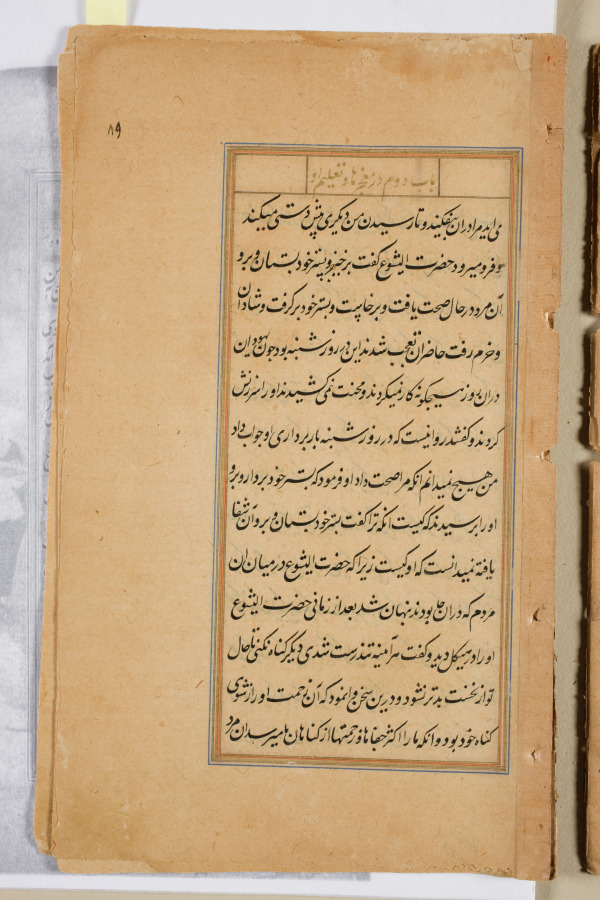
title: Text page from a Mirror of Holiness (Mir’at al-quds) of Father Jerome Xavier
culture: Mughal India, Allahabad, made for Prince Salim (1569–1627)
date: 1602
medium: Ink and gold on paper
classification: Manuscript